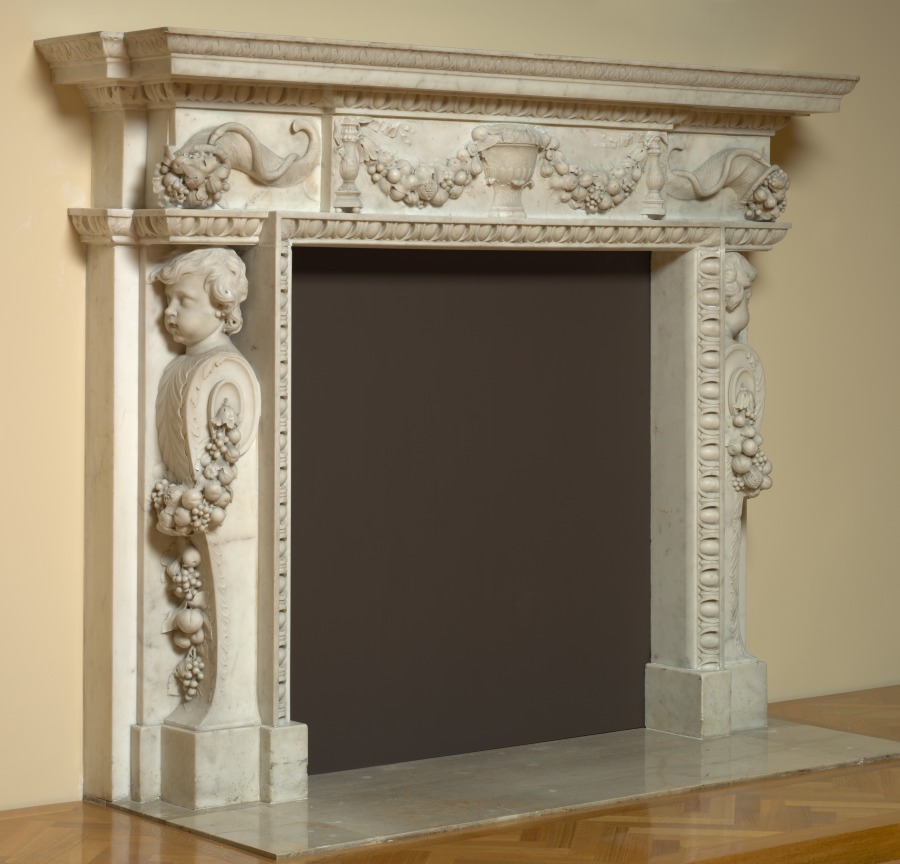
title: Mantel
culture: England, 18th century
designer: after Inigo Jones (English, 1573–1652)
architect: probably by William Kent (British, 1685–1748)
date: c. 1730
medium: marble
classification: Furniture and woodwork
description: The cornucopias and scroll-shaped brackets capped by the bust of the youthful Roman god, Mercury, were inspired by the work of Inigo Jones, one of the first British architects of great renown. The mantel was originally installed in Wanstead House, formerly located on the outskirts of London. Working opposite the architect, Colen Campbell (1676–1729), William Kent completed the interior decoration of the estate and likely produced this mantel as well. When Wanstead House was pulled down in 1822, the Duke of Hamilton purchased the chimney piece and three others from Wanstead House to display in his own home near Glasgow, Scotland.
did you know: Here the presence of the Roman god of trade and abundance (Mercury) within the decorative scheme of this mantel alludes to prosperity and bounty.